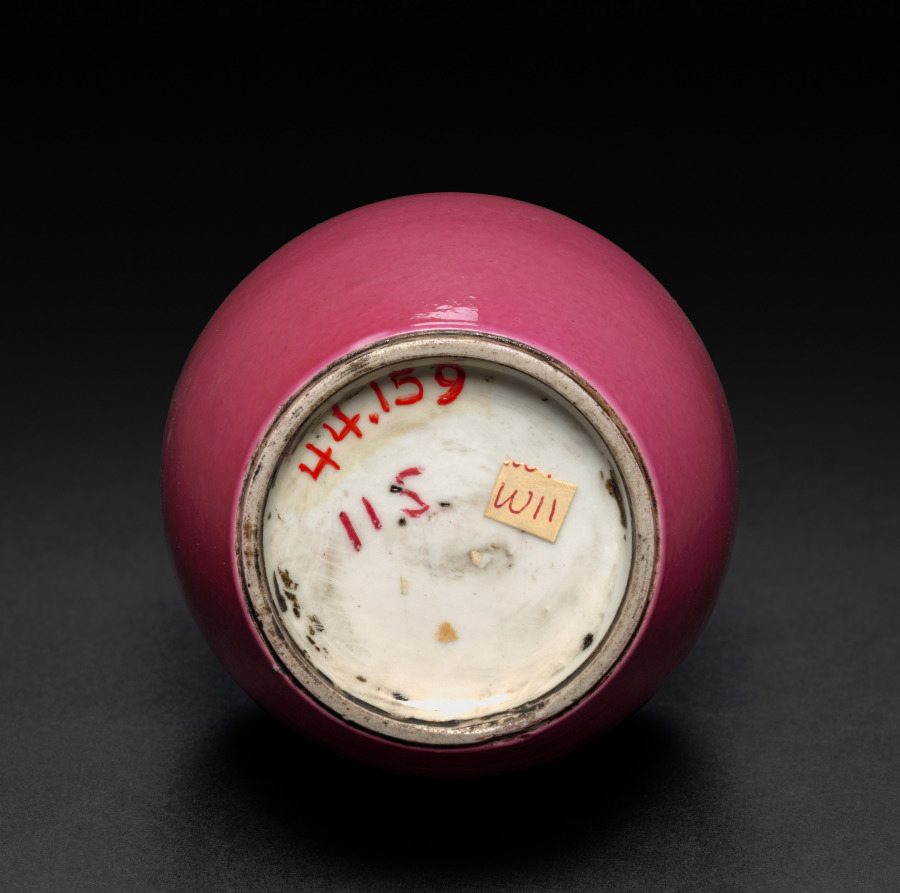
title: Vase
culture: China, Qing dynasty (1644-1911)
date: 1800s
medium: porcelain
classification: Ceramic